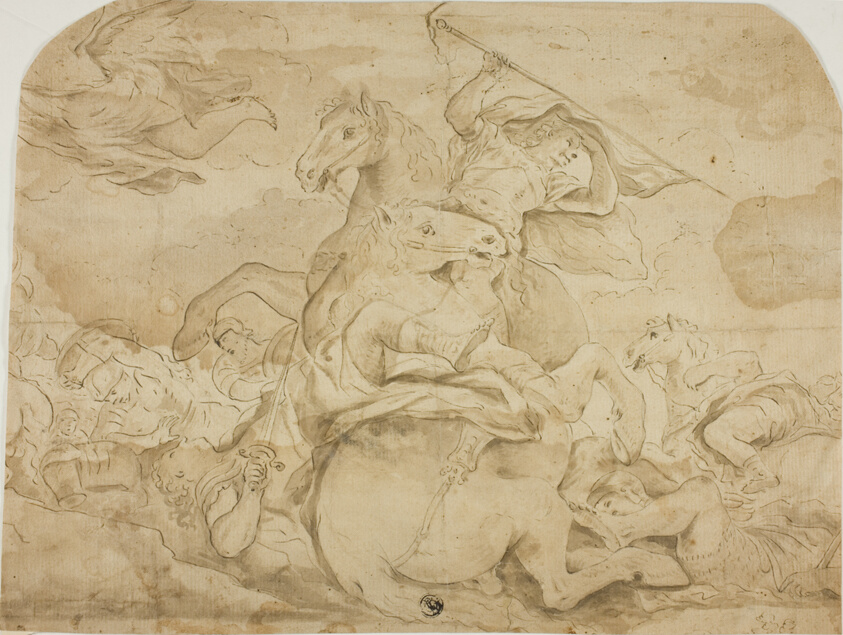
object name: Drawing and Watercolor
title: Battle Scene with Central Figure on Rearing Horse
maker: possibly Unknown German artist; or Style of Luca Giordano (Italian, 1632-1705)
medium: Pen and brown ink, with brush and brown wash, over graphite, on tan laid paper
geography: Germany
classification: pen and ink drawings; drawings (visual works); prints and drawing